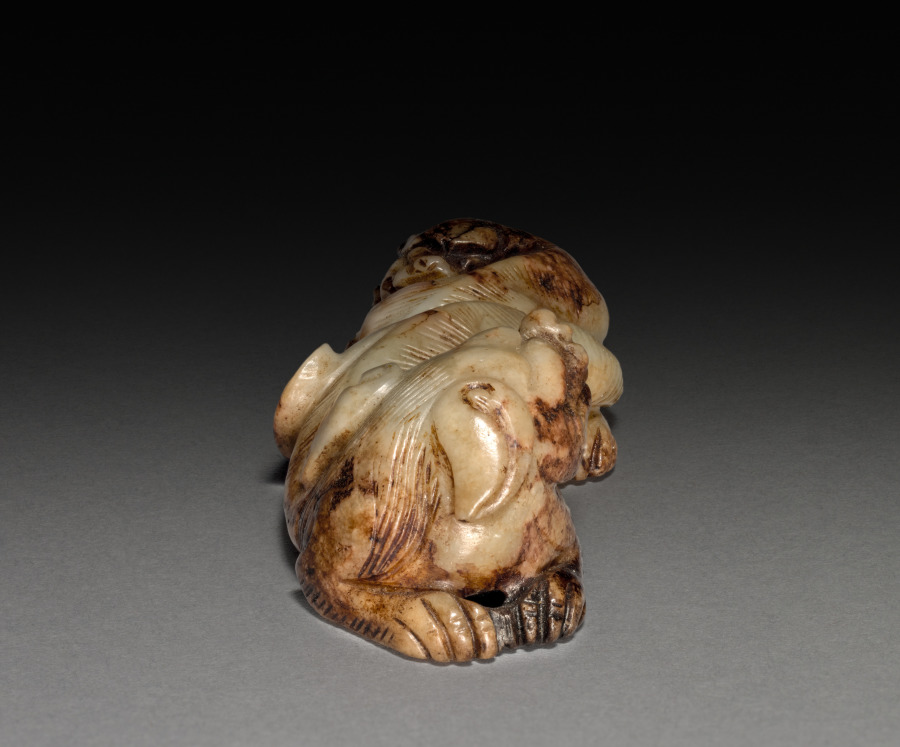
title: Reclining Dog and Puppy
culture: China, Yuan dynasty (1271-1368)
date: 1271–1368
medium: jade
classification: Jade